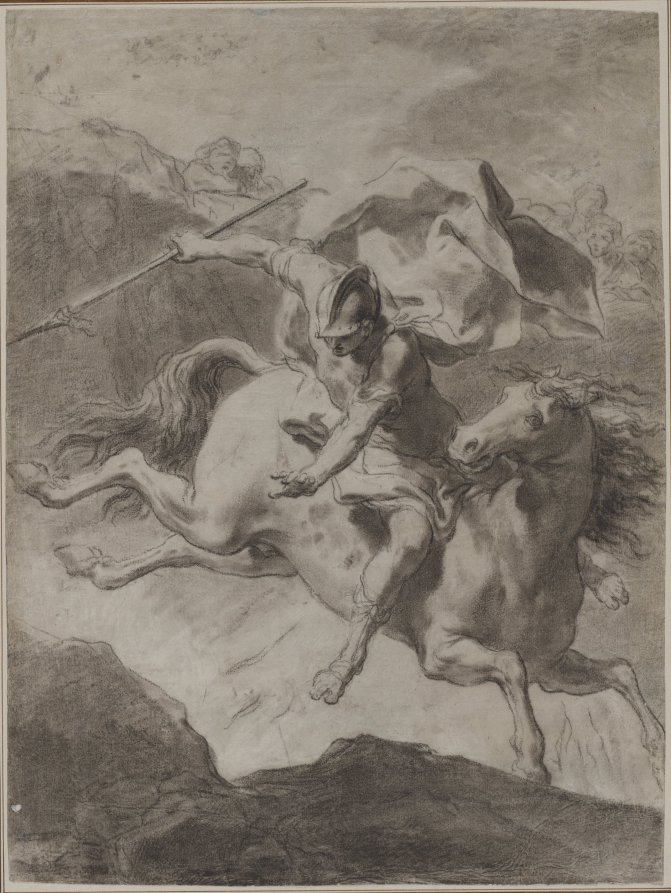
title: Death of Marcus Curtius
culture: Italy, late 18th century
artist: Gaetano Gandolfi (Italian, 1734–1802)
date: 1799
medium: black chalk (stumped in places) and brush and black chalk wash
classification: Drawing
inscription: RECTO, signed, lower left, in black chalk: G. Gand.f 1799- ; lower right, in graphite: CREAM / STOCK / 4W ; lower right, in graphite: 54 ; lower right, in graphite: 12